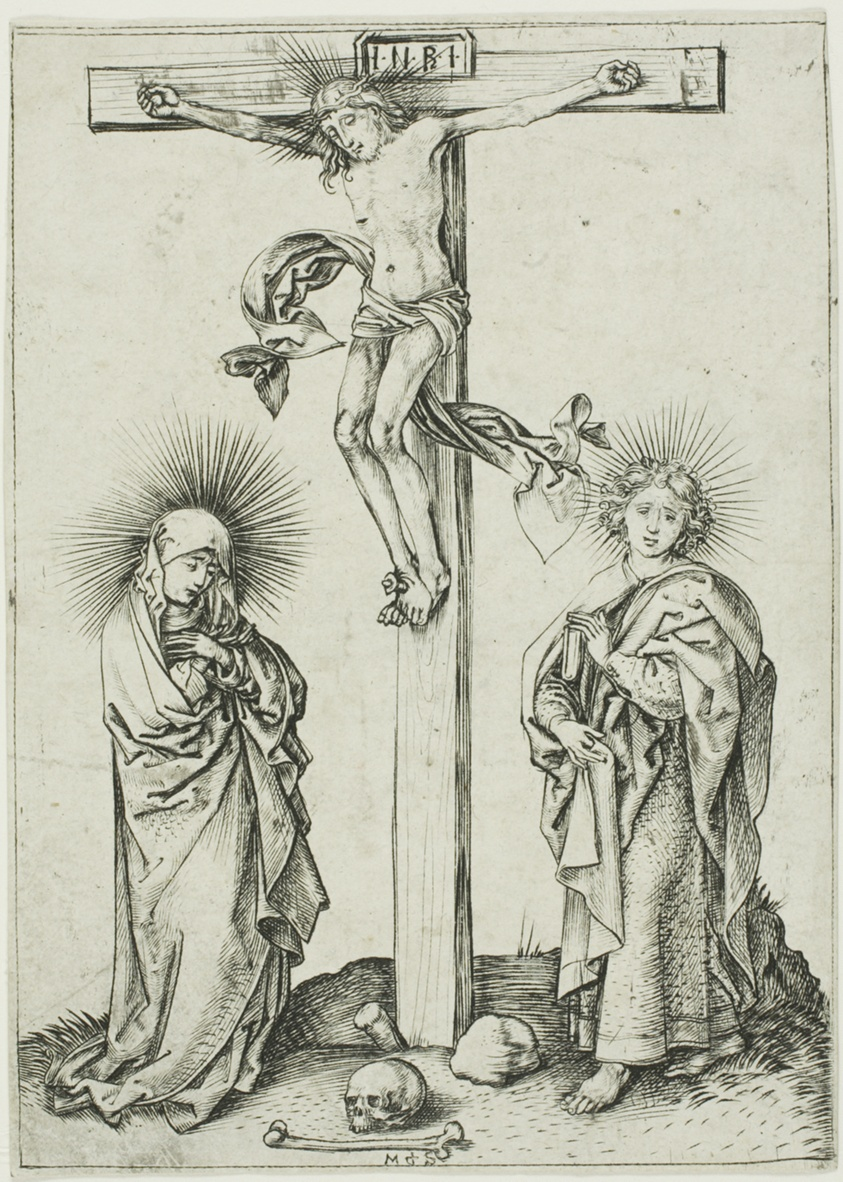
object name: Print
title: The Crucifixion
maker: Martin Schongauer (German, c. 1430/50-1491)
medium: Engraving in black on ivory laid paper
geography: Germany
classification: engraving; print; prints and drawing